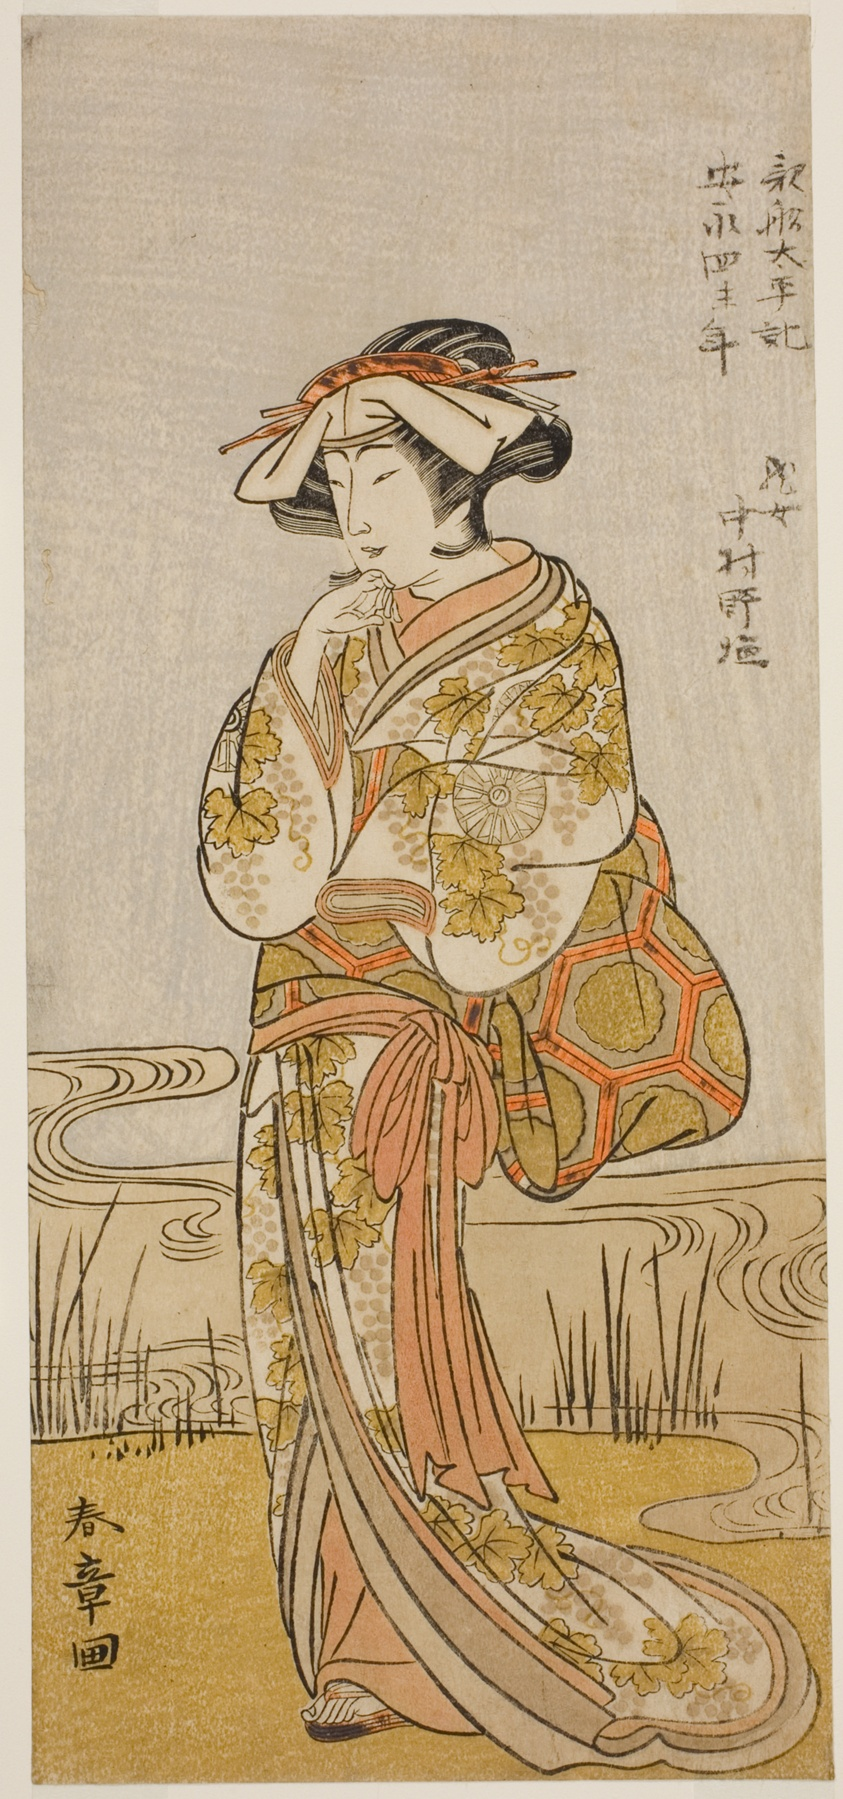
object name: Print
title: The Actor Nakamura Noshio I as a Dragon Maiden Disguised a Tamanami, in the Play Oyafune Taiheiki, Performed at the Ichimura Theater in the Eleventh Month, 1775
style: Japanese (culture or style)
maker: Katsukawa Shunsho 勝川 春章; Japanese, 1726-1792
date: c. 1775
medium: Color woodblock print; hosoban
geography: Japan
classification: woodblock print; print; asian art